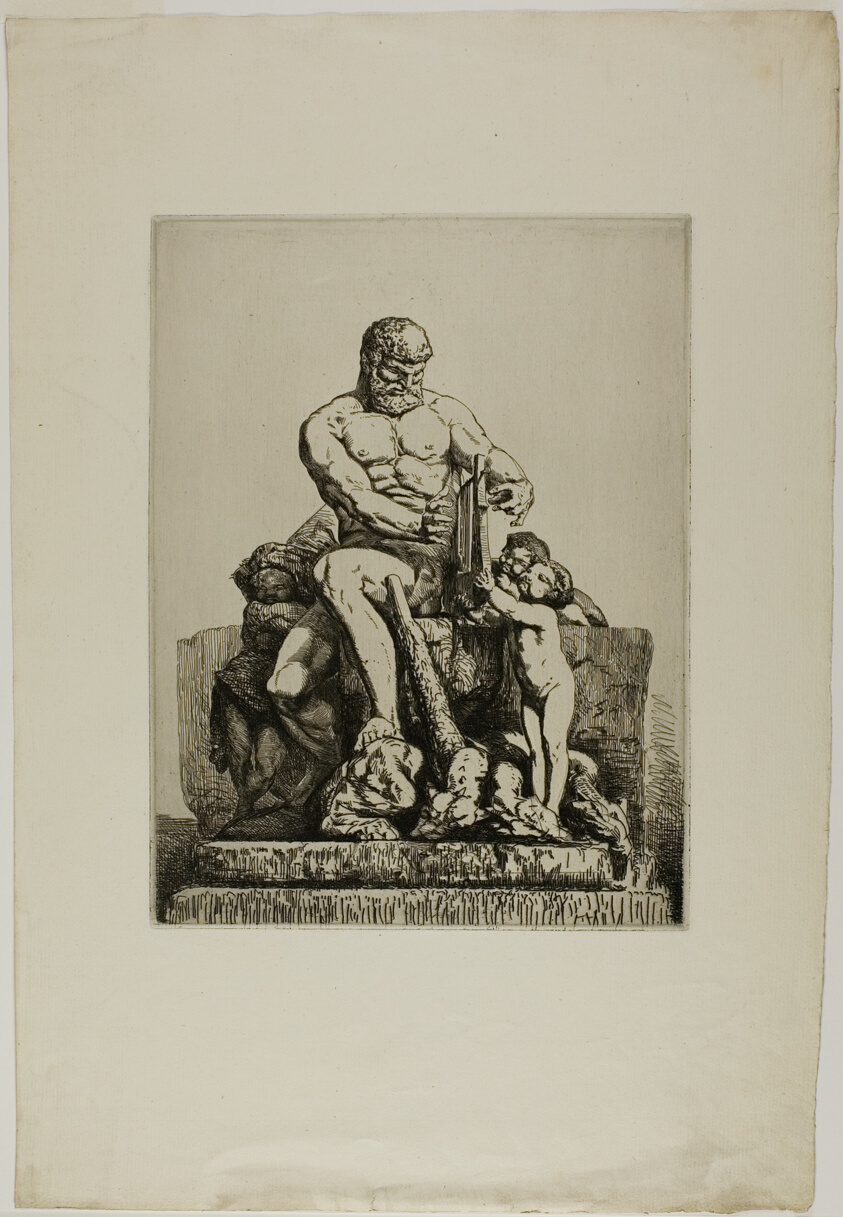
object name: Print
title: Hercules, plate one from Twelve Etchings by Chifflart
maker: Nicholas-François Chifflart (French, 1825-1901); published by Alfred Cadart (French, 1828-1875)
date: 1865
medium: Etching on cream laid paper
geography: France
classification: etching; print; prints and drawing